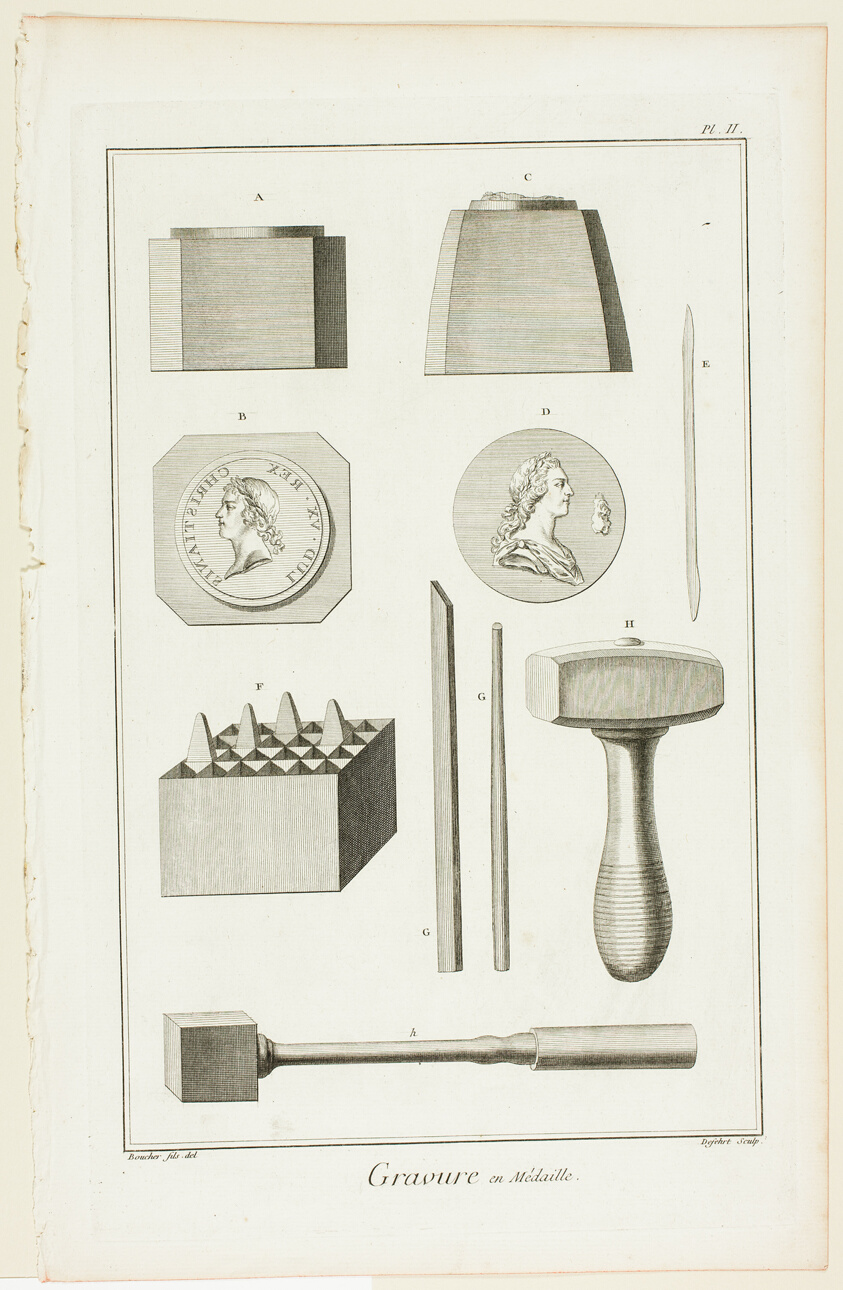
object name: Print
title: Medal Engraving, from Encyclopédie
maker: A. J. Defehrt (French, active 18th century); after André-Jean-Baptiste Boucher d'Argis (French, 1750-1794); published by André le Breton (French, 1708-1779), Michel-Antoine David (French, c. 1707-1769), Laurent Durand (French, 1712-1763), and Antoine-Claude Briasson (French, 1700-1775)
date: 1762/77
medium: Engraving on cream laid paper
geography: France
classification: etching; print; prints and drawing